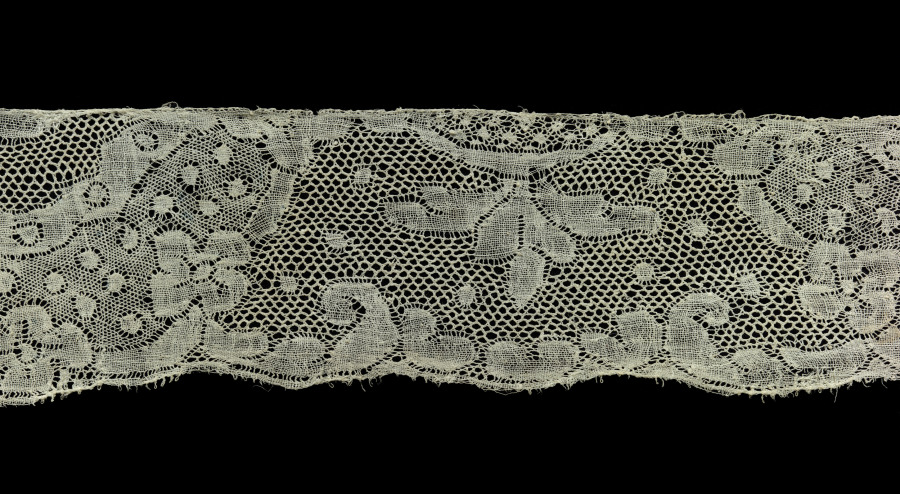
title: Lace Edging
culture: Belgium, Binche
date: 1700s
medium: Linen: bobbin lace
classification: Lace